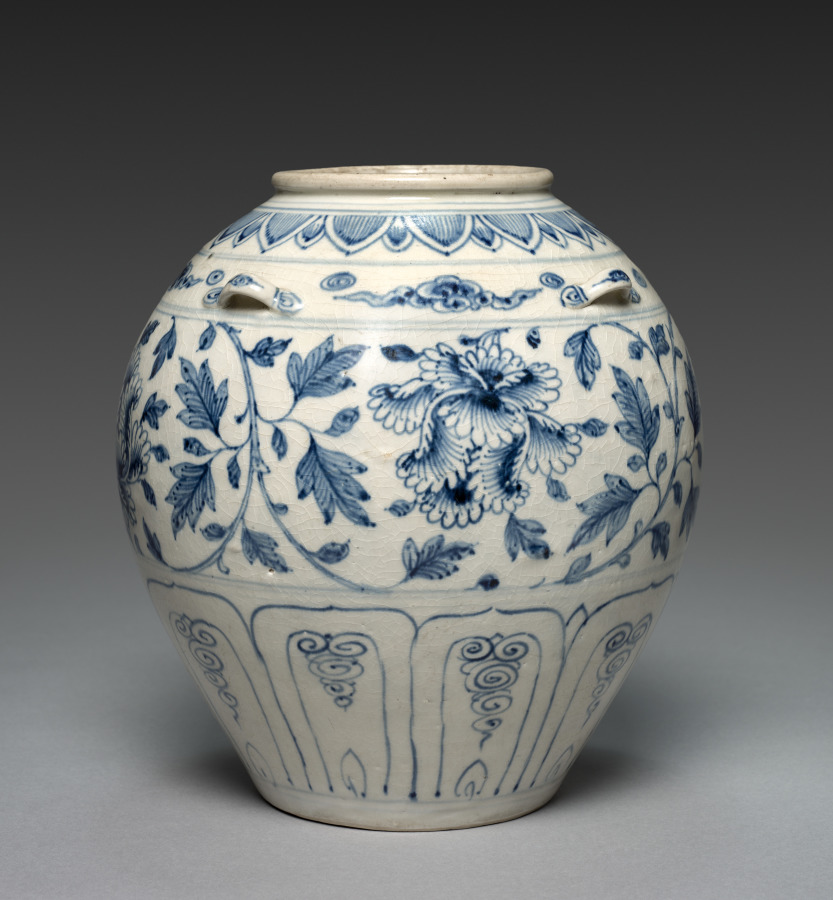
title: Storage Jar: Blue-and-White Ware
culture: Vietnam (Annam)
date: 1300s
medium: porcelain with underglaze blue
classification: Ceramic